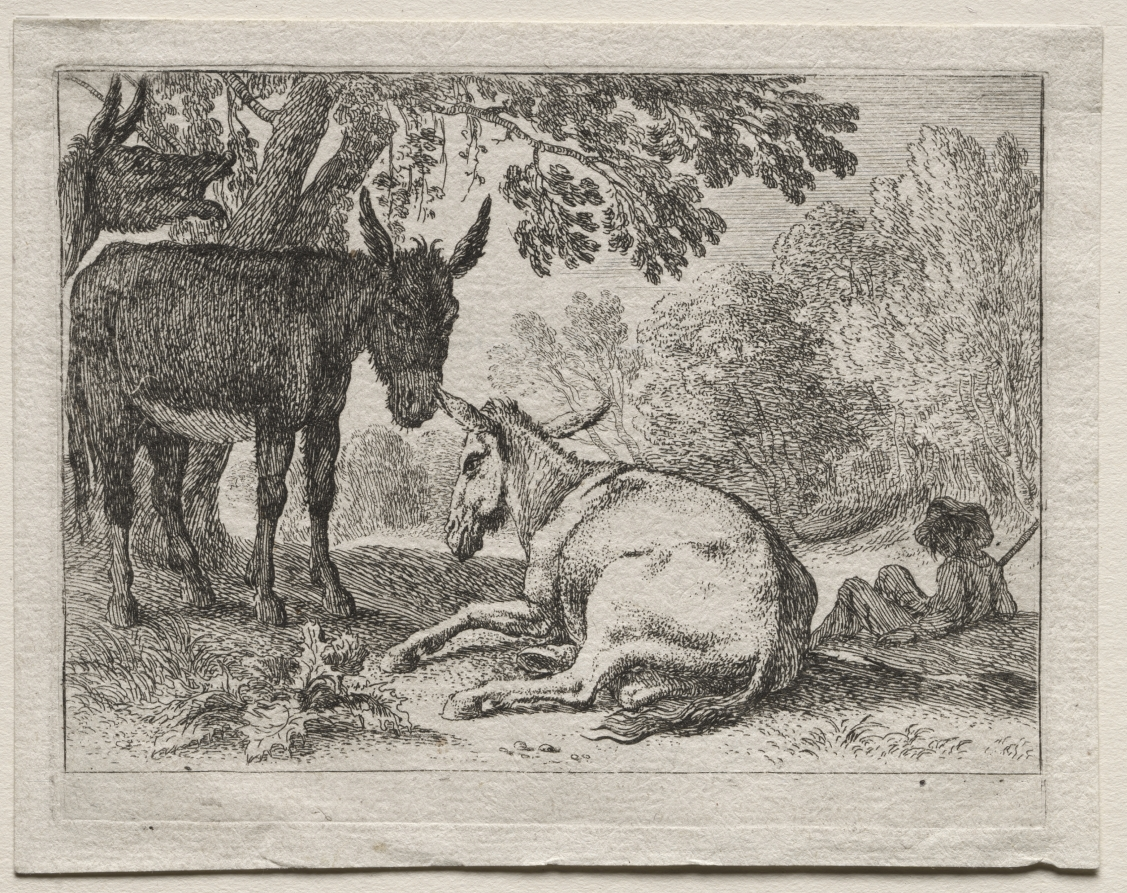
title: Animals in Landscapes: Donkeys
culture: Netherlands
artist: Herman van Swanevelt (Dutch, c. 1600–1655)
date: 1620–55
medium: etching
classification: Print